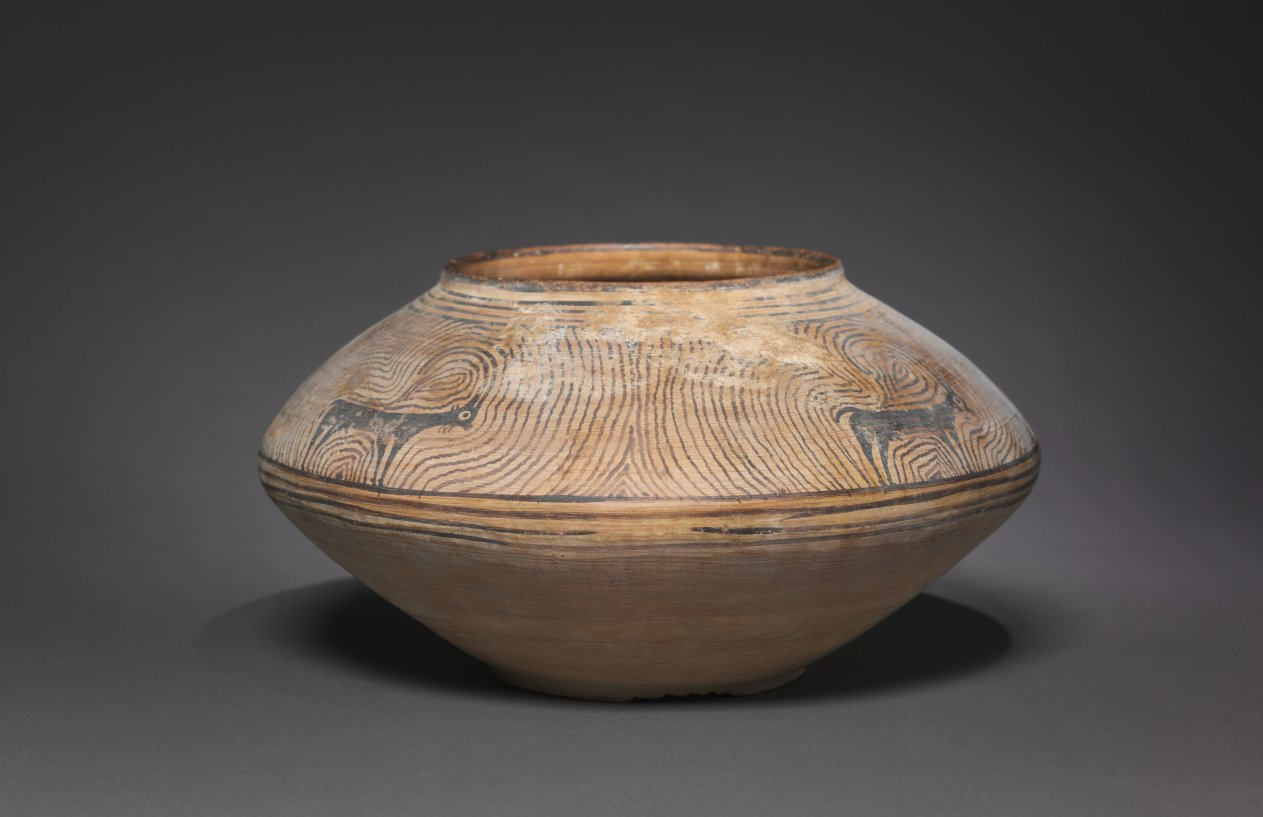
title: Jar with Four Ibex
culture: Pakistan, probably Quetta, Indus Valley Civilization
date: c. 2800–2500 BCE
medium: ceramic with black slip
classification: Ceramic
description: Large numbers of ceramic vessels decorated with black slip have been found among the sophisticated urban settlements of South Asia's protohistoric Indus Valley civilization. The walls of this jar are so thin that it must have been created on a potter's wheel.The four male ibex have two curving horns of exaggerated length, and three hairs under the chin.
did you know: The long-horned ibex is at home in the Himalaya mountains, the source of the Indus River.